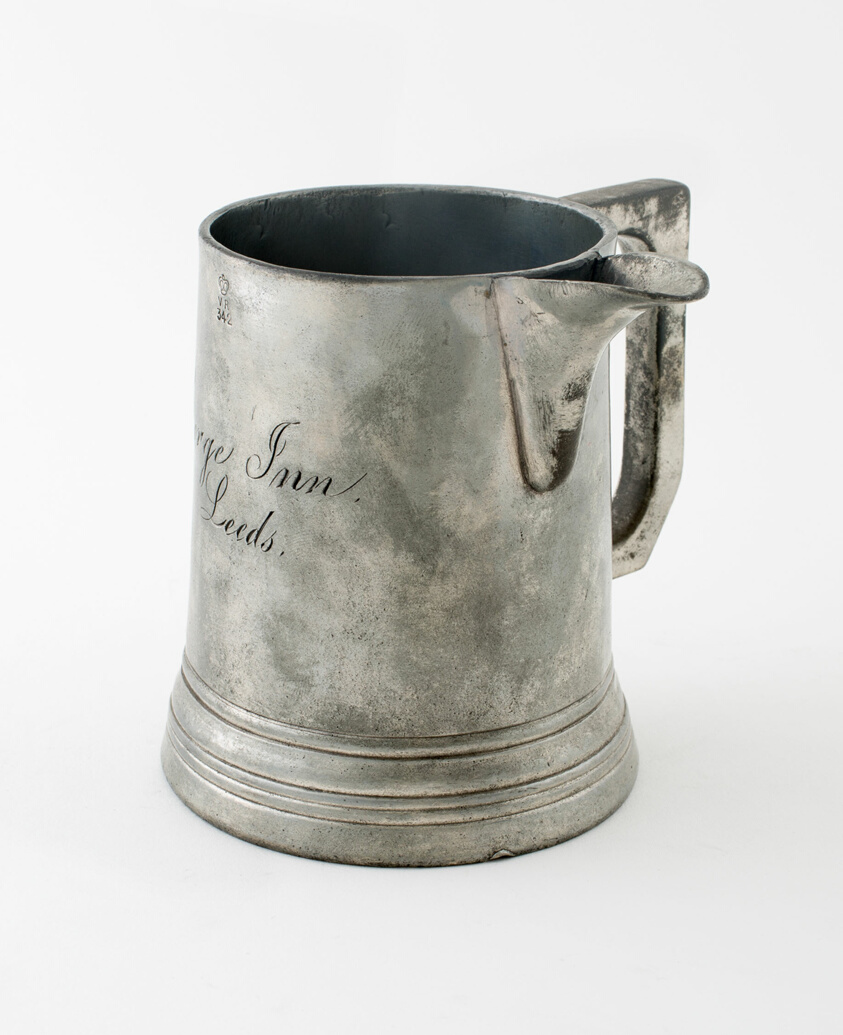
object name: Metalwork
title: Pint Mug with Spout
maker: England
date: c. 1840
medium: Pewter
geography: England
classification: pewter; metalwork; european decorative arts